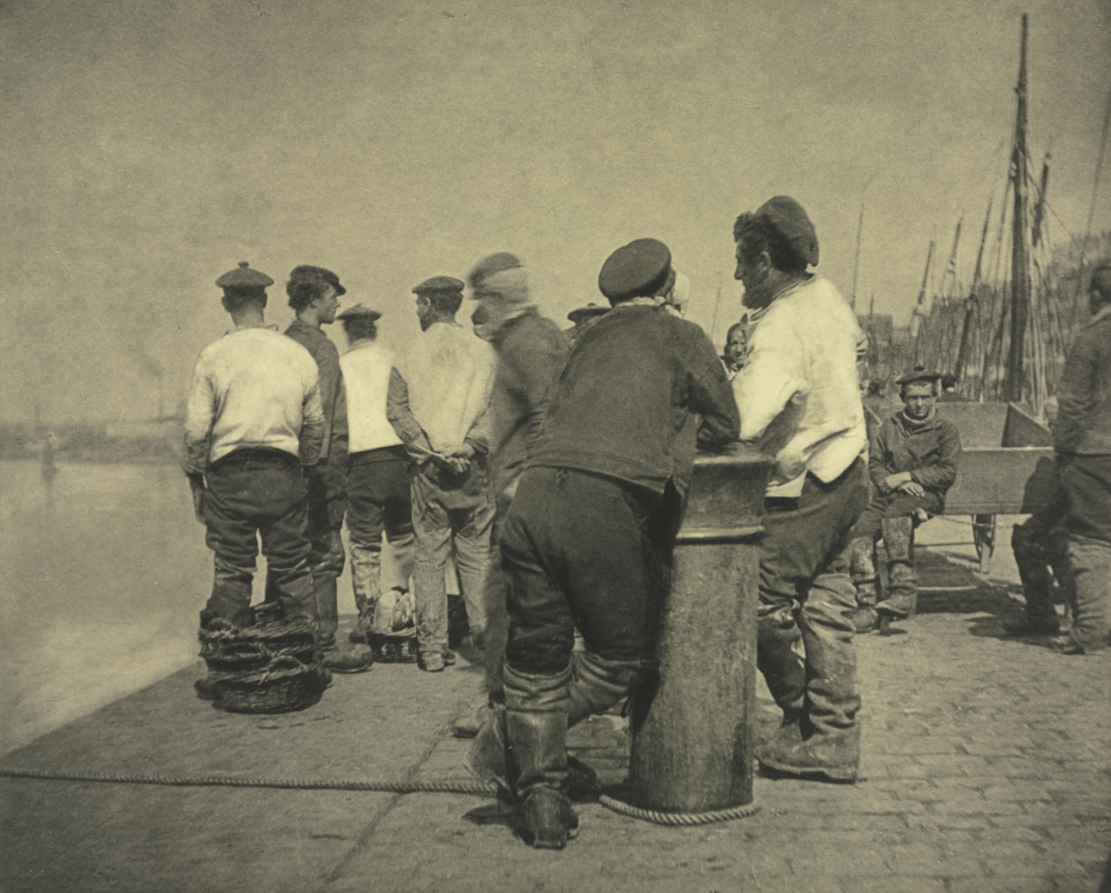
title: Boulogne Fisherman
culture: England, 19th century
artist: Paul Martin (British, 1864–1944)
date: c. 1897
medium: gelatin silver print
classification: Photograph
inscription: Written in pencil on recto of mount: "Boulogne Fisherman [underlined] / Paul Martin"; in pencil on verso of mount: "Boulogne Fisherman / Paul Martin / 55 Hosack Rd / Balham. S.W.17"; "W.C.C."